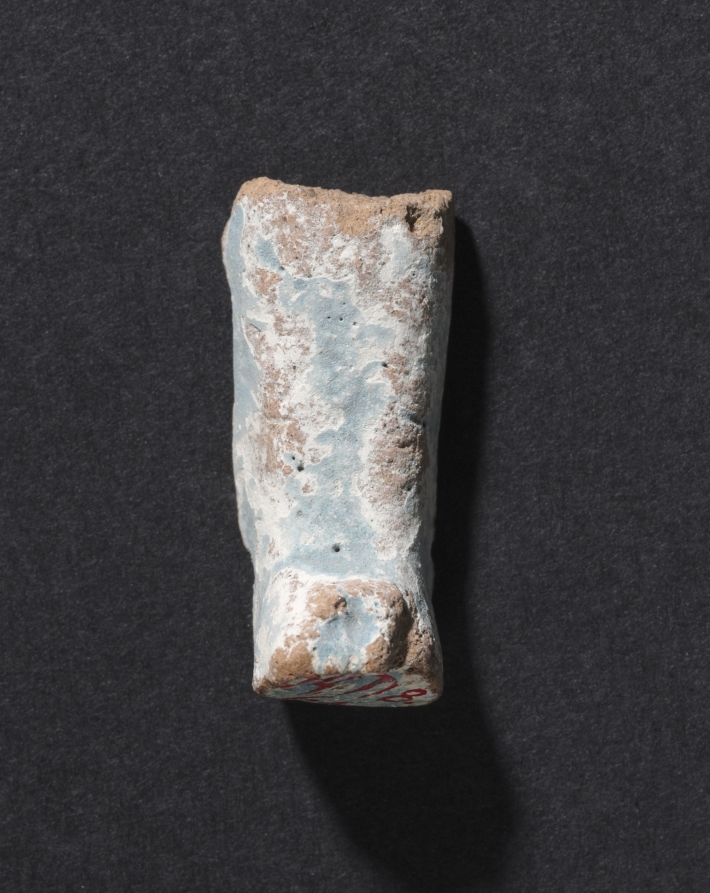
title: Shawabty of Ditamenpaankh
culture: Egypt, Late period (715–332 BCE), Dynasty 25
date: 715–656 BCE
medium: terracotta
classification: Funerary Equipment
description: High demand for shawabtys in the Late Period, a time when as many as 400 or more shawabtys were placed in the tomb with the deceased, gave rise to a specialized container for storing them: the shawabty box. This example is inscribed for the lady of the house, Ditamenpaankh, and was probably one of a pair originally made for her. The single-masted boat on the box's lid is perhaps an allusion to the pilgrimage of the deceased to the holy city of Abydos, the cult city of Osiris, king of the dead. The shawabtys inside are crude, mass-produced examples cast in an open mold. Made of terracotta, their blue paint imitates more costly shawabtys made of faience. As for the shawabty spell, it has been removed from its traditional location on the shawabty's front and relocated onto the sides of box, where it needed only to be written once, thus expediting production.